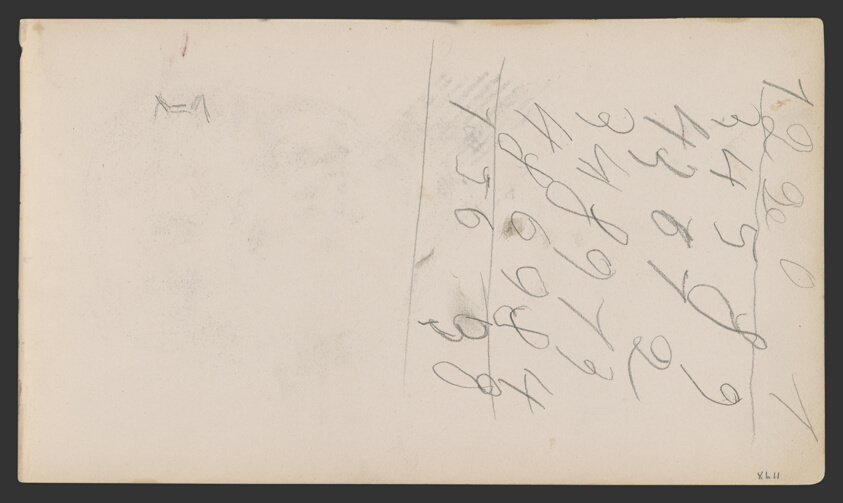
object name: Drawing and Watercolor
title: Sketchbook No. 2 (L'Estaque)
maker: Paul Cézanne; French, 1839-1906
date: 1875–86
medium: Graphite and pen and ink drawings on paper, bound into a book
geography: France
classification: sketchbook; graphite; prints and drawing; paper